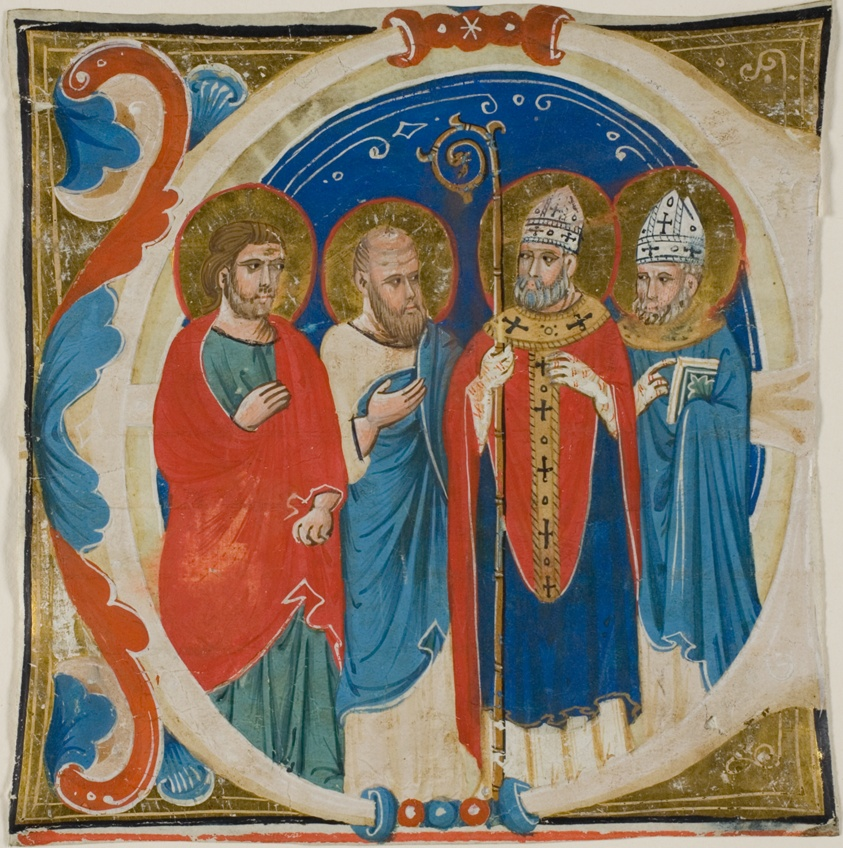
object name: Drawing and Watercolor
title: Two Saints and Two Bishops in a Historiated Initial "E" from a Choir Book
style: medieval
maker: Italian (Siena or Bologna)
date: 1335/1400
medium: Manuscript cutting in tempera and gold leaf, with Latin inscriptions in brownish-black ink, ruled in red ink, verso, on vellum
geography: Italy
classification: tempera; manuscript; drawings (visual works); prints and drawing